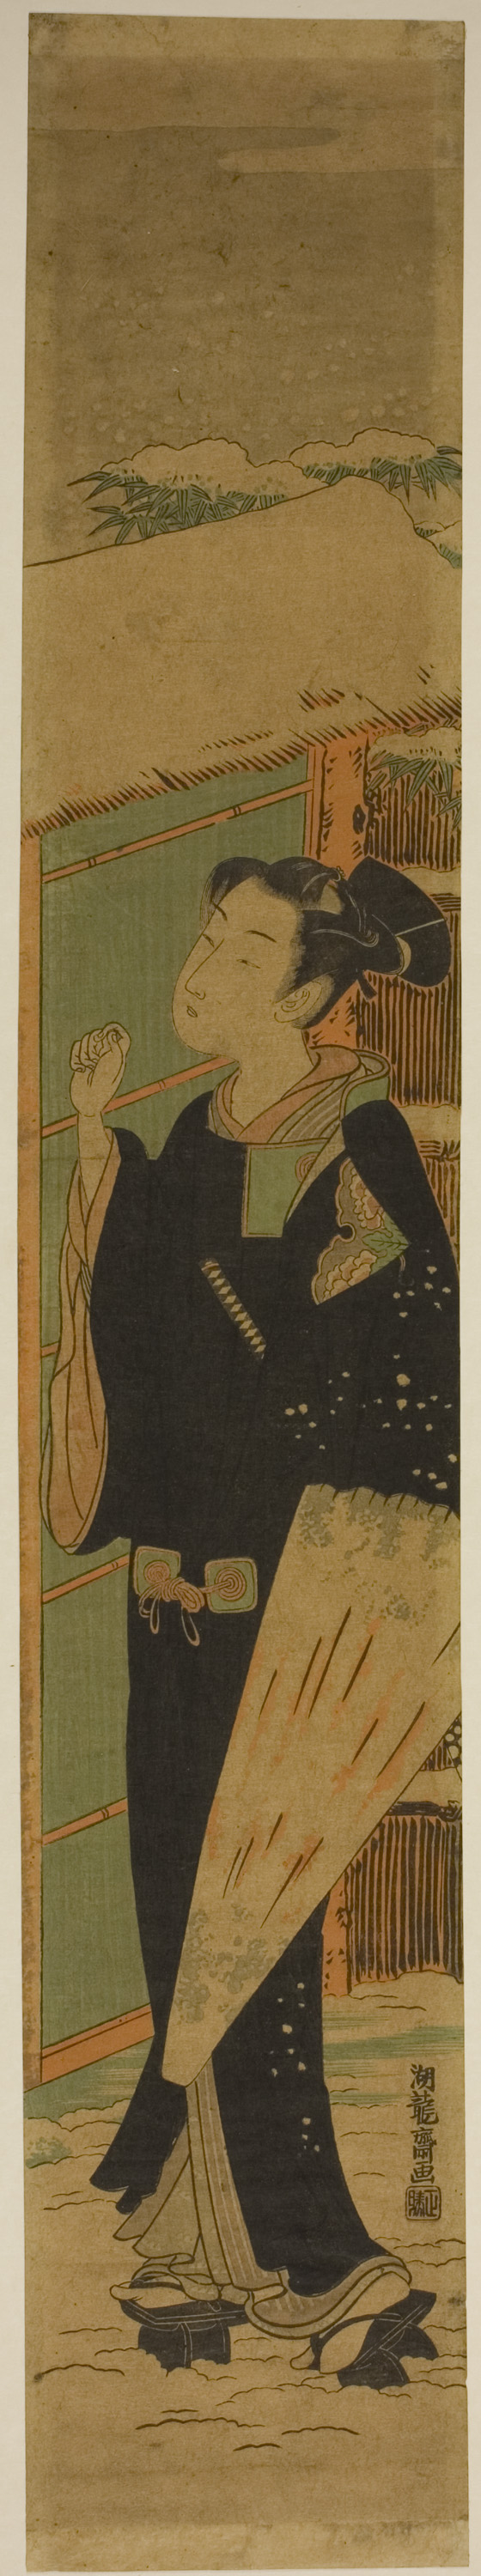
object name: Print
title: Young Man with Umbrella Knocking on Gate in Snow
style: Japanese (culture or style)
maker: Isoda Koryusai (Japanese, 1735-1790)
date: c. 1774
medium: Color woodblock print; hashira-e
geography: Japan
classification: woodblock print; print; asian art